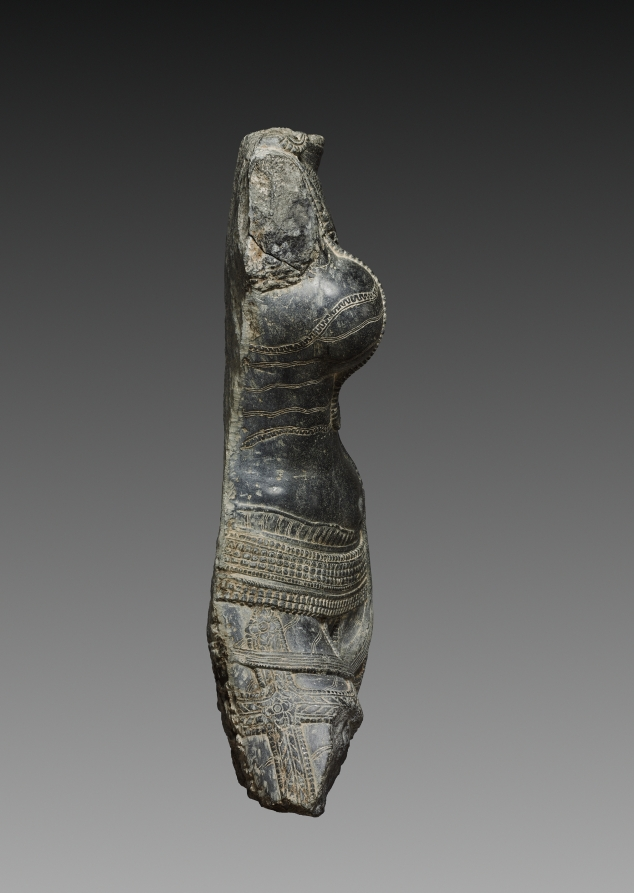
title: Female torso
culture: Northeastern India, Pala dynasty (730-1197)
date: 1000s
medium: black chlorite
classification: Sculpture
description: This life-size sculpture of a female figure was likely installed by a doorway or in an exterior niche of a Buddhist temple. Throughout the history of Indian art, voluptuous female figures have adorned Buddhist sanctuaries. Embodying the Indian ideal of female beauty, the form of the young mother with full breasts of milk personifies abundance, nourishment, and productivity—ideas that were considered auspicious and life affirming. Her copious jewels and valuable textiles also visually relate that the good karmic actions of venerating the Buddha and following his teachings will result in abundant good fortune.